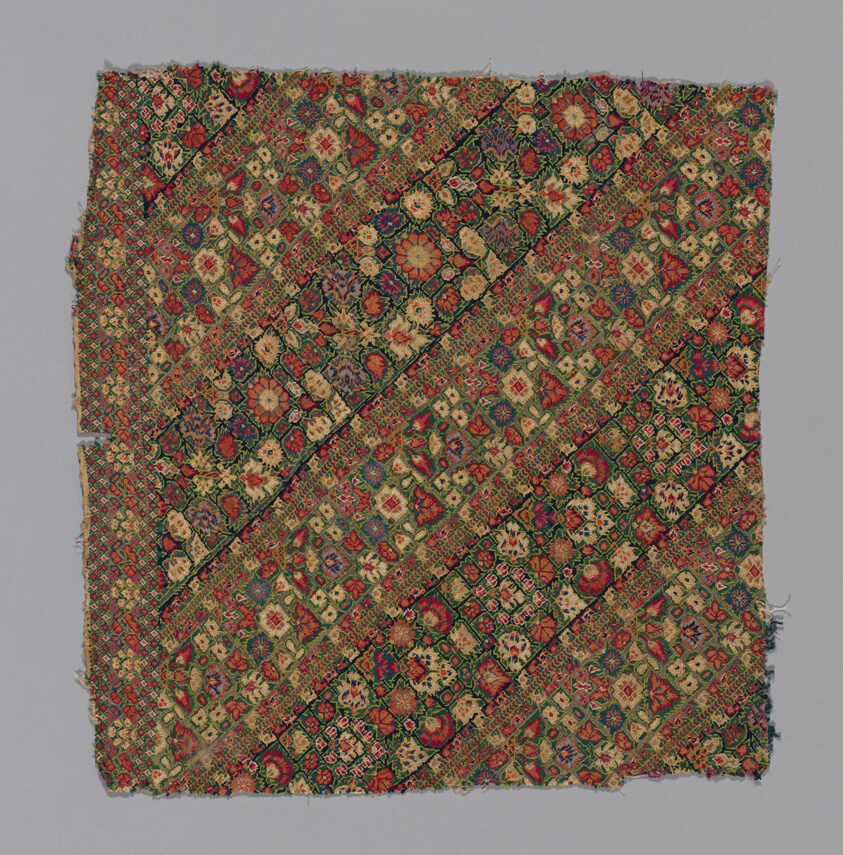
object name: Textile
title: Fragment (Nakshe)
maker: Iran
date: 1875/1900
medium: Colored silk on linen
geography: Iran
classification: textile; needlework (visual works)